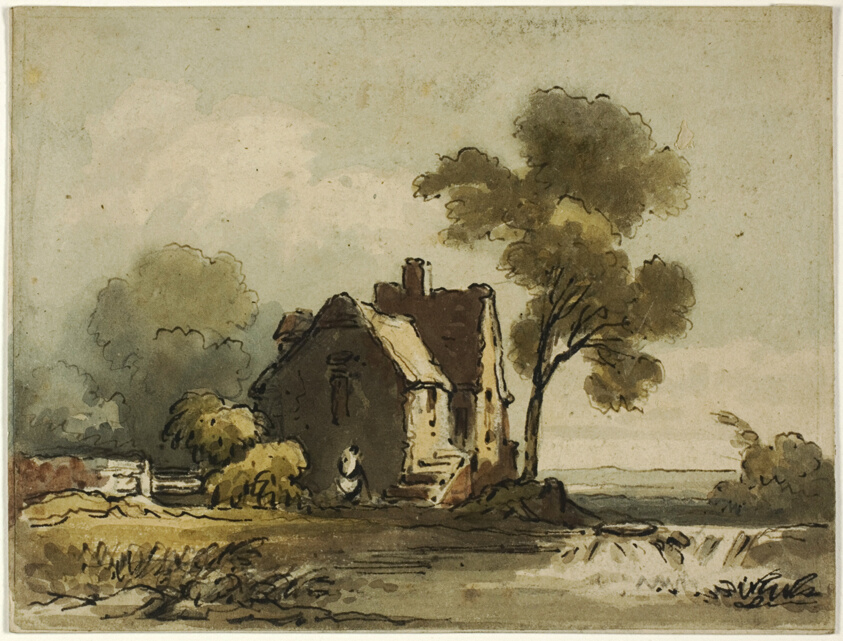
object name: Drawing and Watercolor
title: Farmhouse (recto); Landscape with Church Tower (verso)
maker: James "Drunken" Roberstson; English, active 1815-1836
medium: Pen and brown ink with brush and watercolor, over graphite, on ivory laid paper (recto), and graphite on ivory wove card (verso), laid down on ivory wove card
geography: England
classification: watercolor; drawings (visual works); prints and drawing